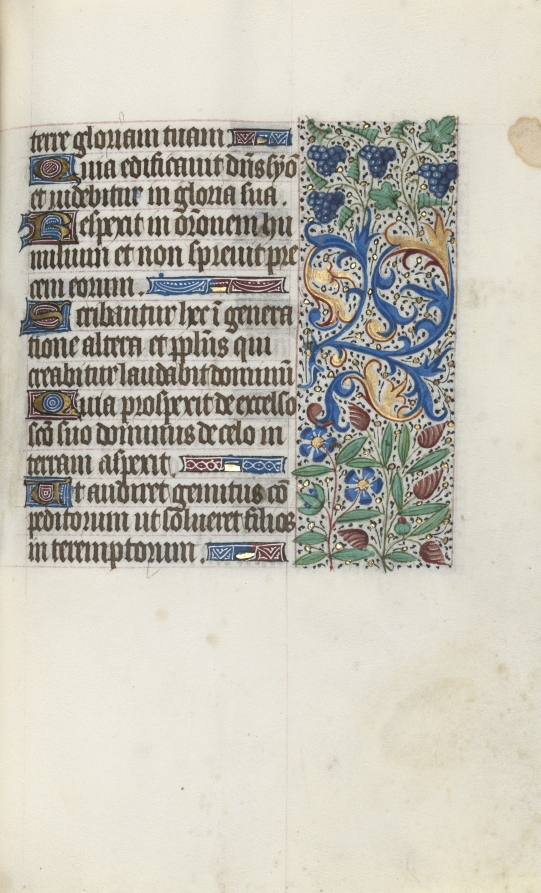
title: Book of Hours (Use of Rouen): fol. 89r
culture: France, Rouen, 15th century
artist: Master of the Geneva Latini (French, active Rouen, 1460–80)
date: c. 1470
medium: ink, tempera, and gold on vellum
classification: Bound Volume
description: In the late 1400s and early 1500s Rouen was an established and important center of book production. The city’s cathedral had a wealthy chapter that spent large sums of money to commission books and to maintain its extensive library. The stationers and booksellers would have likely been concentrated in or near the cathedral precinct. This artist, named after a manuscript now in Geneva, was Rouen’s principal illuminator during the second half of the 1400s.